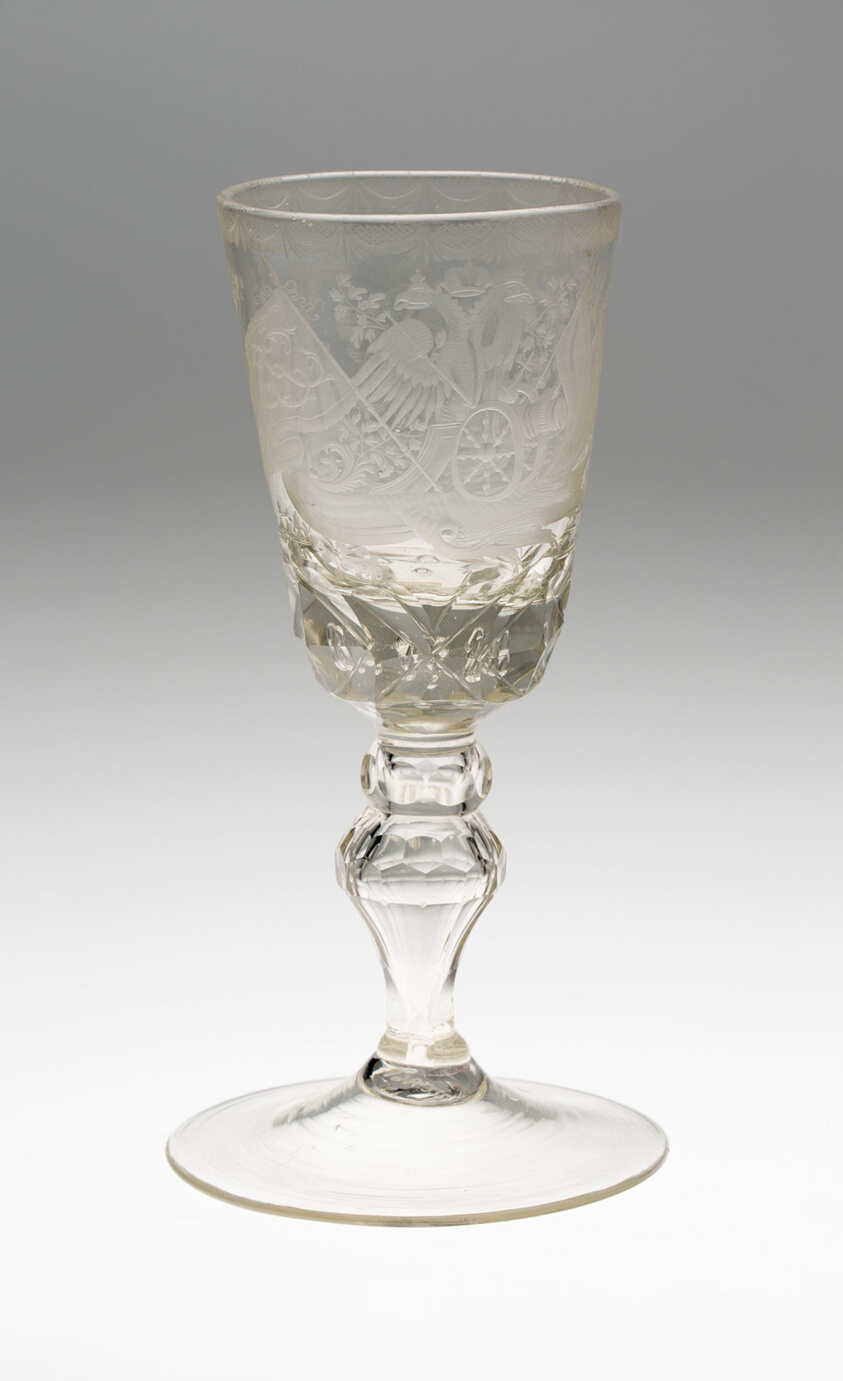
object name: Glass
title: Goblet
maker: Russia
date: c. 1760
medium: Glass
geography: Russia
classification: drinking vessel; glass; european decorative arts